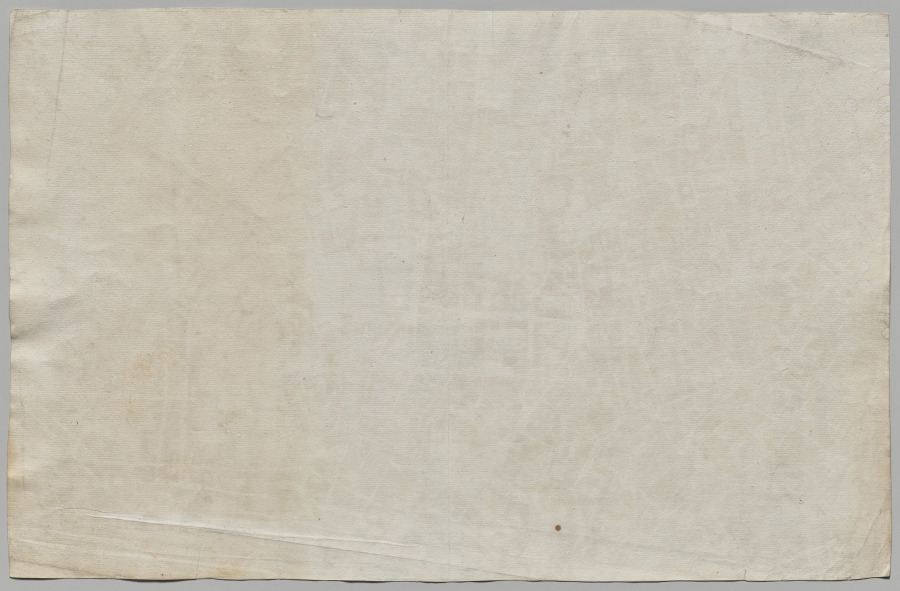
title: Nuova pianta di Roma data in luce da Giambattista Nolli l’anno MDCCXLVII, known as La Pianta Grande di Roma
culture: Italy, 18th century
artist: Giovanni Battista Nolli (Italian, 1701–1756)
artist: Carlo Nolli (Italian, 1690–1790)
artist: Rocco Pozzi (Italian, 1701–1774)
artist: Pietro Campana de Soriano (Italian, 1725–c. 1779)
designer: Stefano Pozzi (Italian, 1699–1768)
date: 1748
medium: etching and engraving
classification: Print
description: The monumental Pianta Grande di Roma, or Large Plan of Rome, which measures about 5 x 7 feet when its twelve plates are assembled, is a landmark in both cartography and printmaking. The map is considered the first scientific rendering of Rome, establishing new standards of accuracy and thoroughness when it was published in 1748. Devised by the Lombard architect and surveyor Giovanni Battista Nolli (Italian, 1701-56), the creation of the map required over ten years of surveying the city carried out by Nolli and a team of assistants with the help of new measuring devices. In Nolli’s “ichnographic” (also called “ground”) plan, architectural features and the urban infrastructure are reduced to a single horizontal slice, a minutely detailed footprint that conveys dimensions, proportions, and orientations to scale with the utmost clarity.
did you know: To make this map, Pope Clement XII granted the mapmaker permission to measure courtyards and other interior, inaccessible spaces in monastic communities, even those in nuns’ convents, which was controversial at the time.